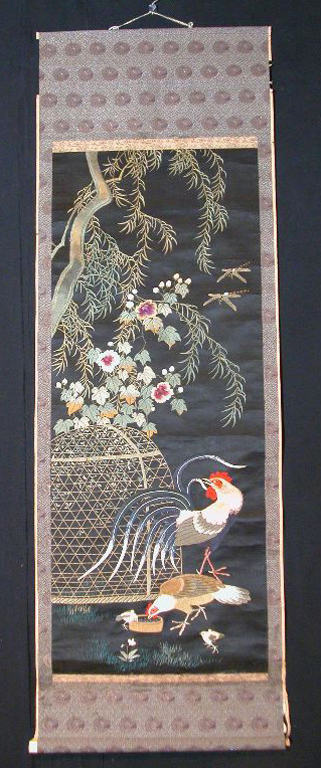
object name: Textile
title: Scroll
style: Japanism, meiji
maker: Japan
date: Meiji period (1868–1912), c. 1880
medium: Mount and inner mount: Silk, cotton and gold-leaf-over-lacquered-paper strip, twill weave with plain interlacings of secondary binding warps and patterning wefts; scroll panel: silk and cotton, satin weave; embroidered with silk in Chinese knot, satin, single satin, and stem stitches; laidwork and couching; tying tape: cotton, plain weave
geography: Japan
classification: textile; needlework (visual works)